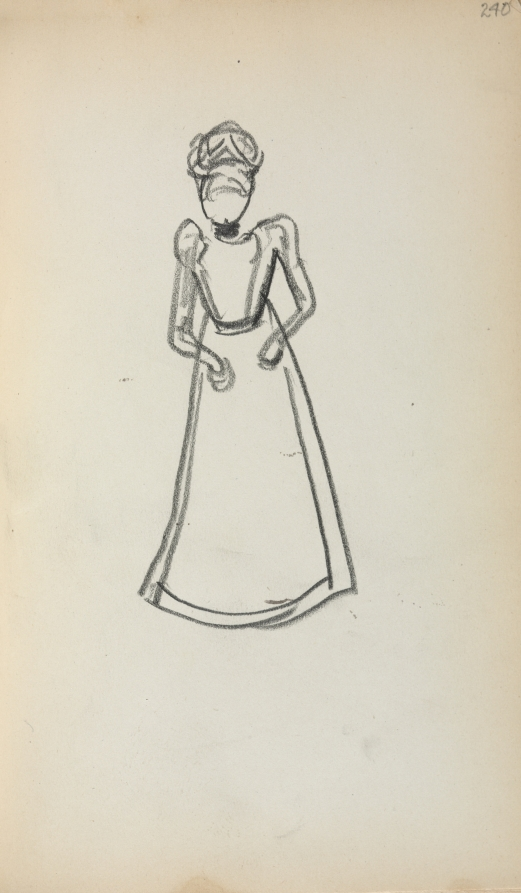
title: Italian Sketchbook: Standing Woman (page 240)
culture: America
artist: Maurice Prendergast (American, born Newfoundland [now Canada], 1858–1924)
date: 1898–1899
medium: pencil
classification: Bound Volume